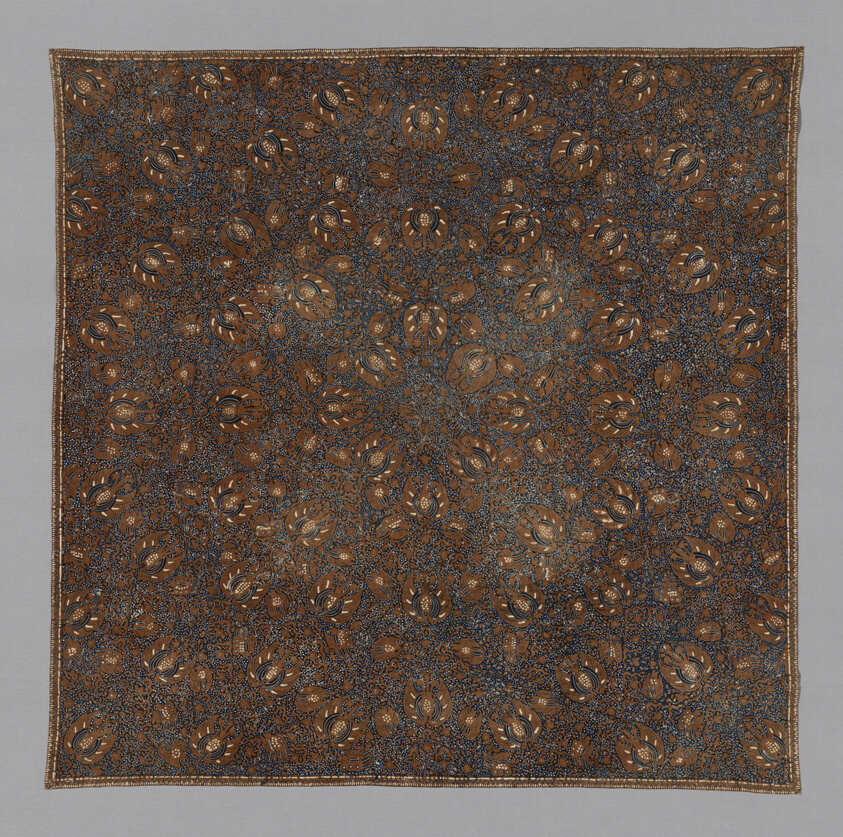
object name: Costume and Accessories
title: Iket (Headcloth)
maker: Indonesia, Java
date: 19th century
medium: Cotton, batik dyed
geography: Java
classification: textile; weaving; costume; dress (garment); clothing